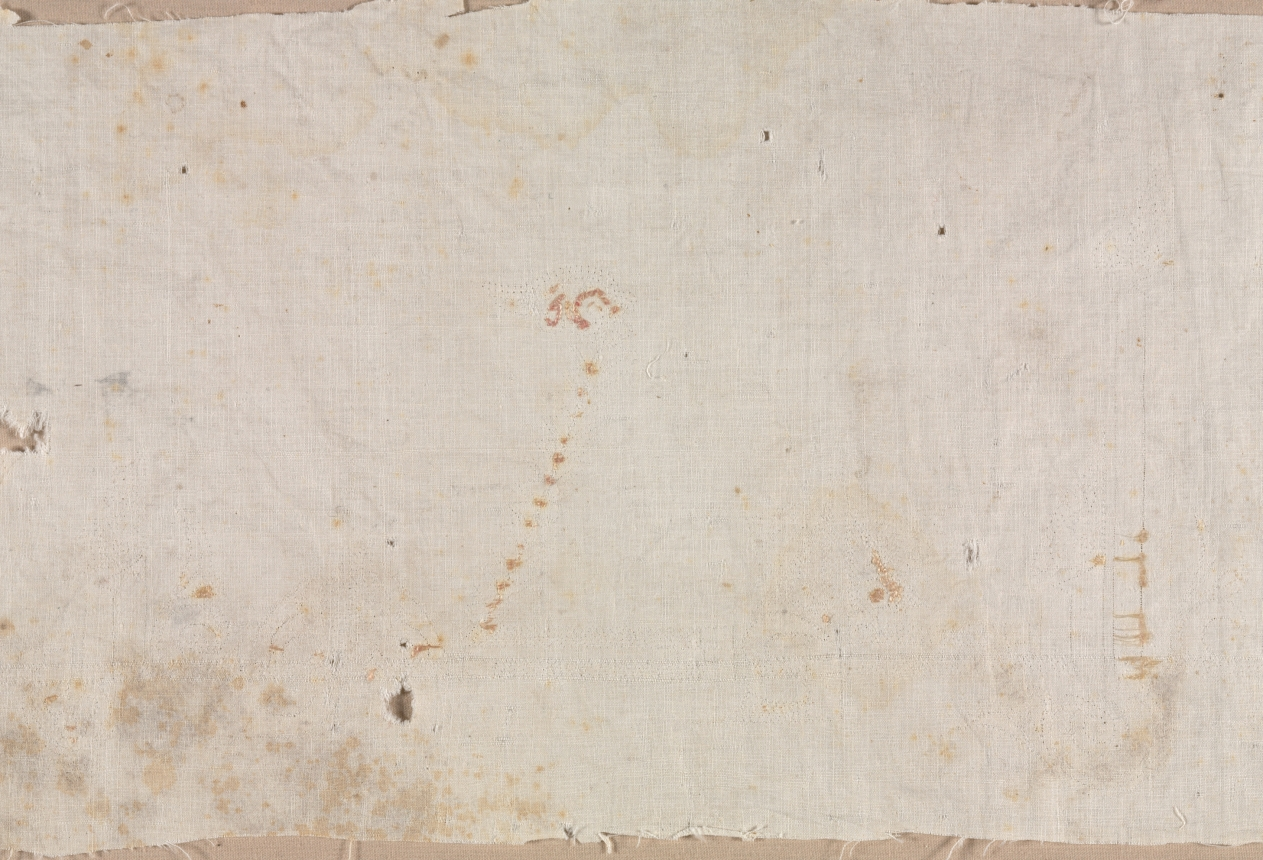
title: Tiraz of Caliph ‘Abd al-Rahman III, from the reliquary of Santa Librada, Cathedral of Seqüenza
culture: Spain, Cordoba, Spanish Umayyad period (756–1031)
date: 941–42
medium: Linen; silk: embroidery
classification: Embroidery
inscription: only the traces of a very large-scale elaborately foliated Kufic inscription preserved, largely in the form of needle holes but with a few small areas where the stitches are intact. This is approximately the second half of the original full inscription, which measured well over two meters long; the bulk of the original textile with the first half of the inscription was formerly preserved in the Cathedral of Siquenza. As preserved on the two fragments, the full inscription reads: "[Commander of the Be]lievers al-Masir li-Din al-Muslimin, may God support him! That which was made through the agency of Durri, his servant, in the year thirty and three hundred."